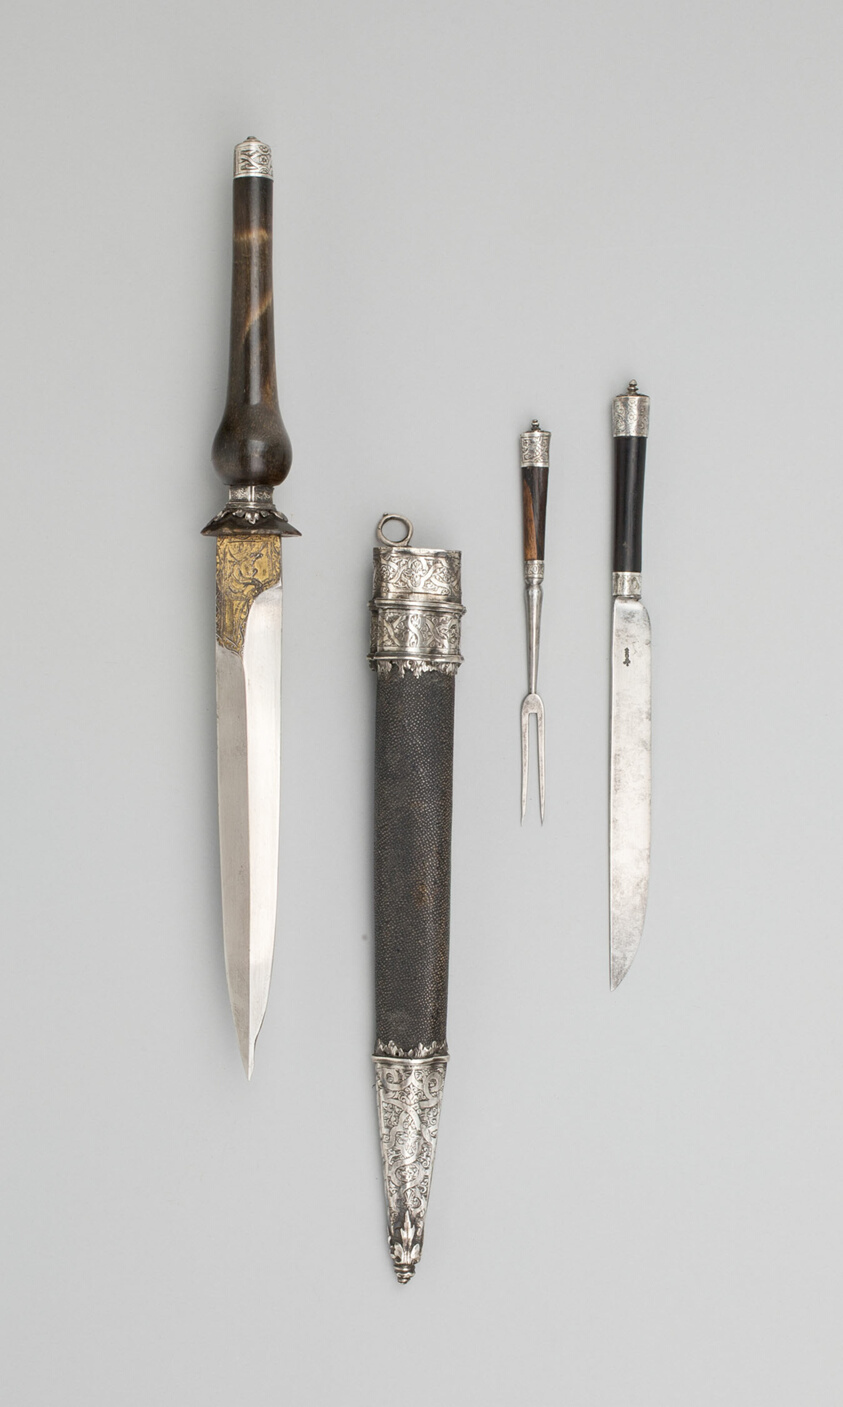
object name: Arms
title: Hunting Plug Bayonet with Eating Utensils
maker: German, Saxony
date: 1800/1900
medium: Horn, silver, gold, and sharkskin (sheath)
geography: Germany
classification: combination weapon; arms; arms and armor